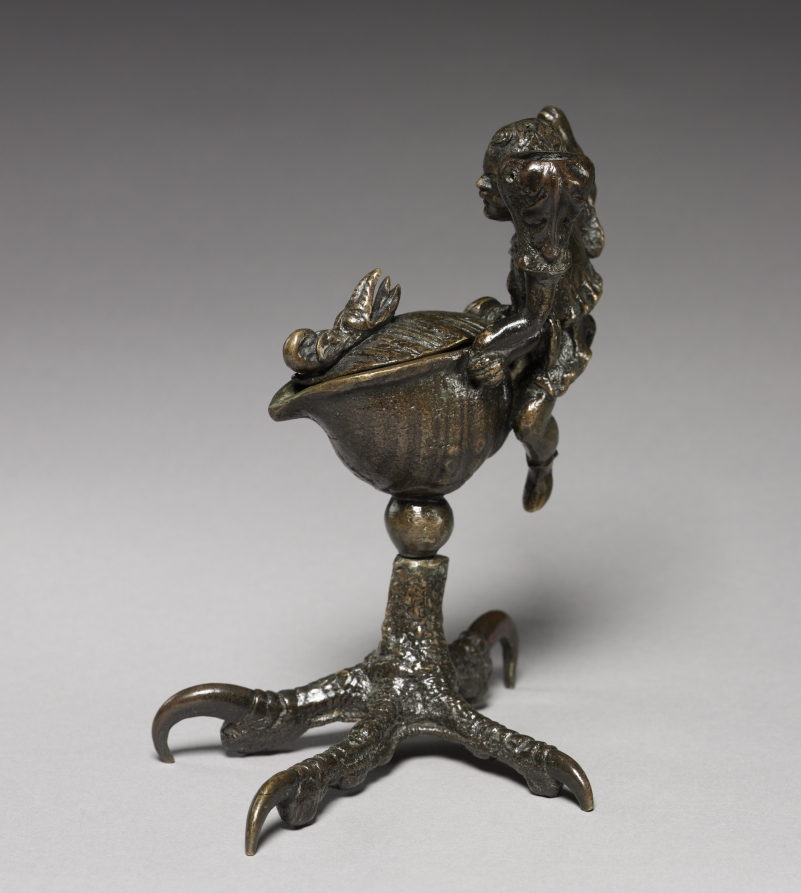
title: Inkwell and Candlestick with the Infant Hercules Killing the Serpents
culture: Italy, Ravenna, 16th century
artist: workshop of Severo da Ravenna (Italian, c.1496–c.1543)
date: c. 1510–20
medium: bronze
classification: Sculpture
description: In the early 1500s, Padua, a center of strong humanist traditions, encouraged the revival of classicism, and artists took their cues from descriptions in the works of classical authors. Classical small-scale bronzes grew in demand, and in response, the city's bourgeoning foundries produced a varied and extensive supply of small statues. Like many early Paduan bronzes, this work's utilitarian function—used to hold ink and to supply light—is complimented by its ornamental value. The base consists of an eagle claw, cast from life, supporting an equally realistic nautilus shell. Though medieval artists had occasionally used seashells to hold paints, the shell inkwell, whose small size makes it rather impractical to use, was a motif particular to Padua. Perched upon the shell is most likely Hercules, the son of Zeus. Perhaps aided by a staff (now missing) he is poised to strike a serpent, which according to myth was sent by Hera, the jealous wife of Zeus, to kill him. The dramatic opposition of hero and monster enhances the connection to the classical past, further meeting the desires of the educated patrons of Padua.